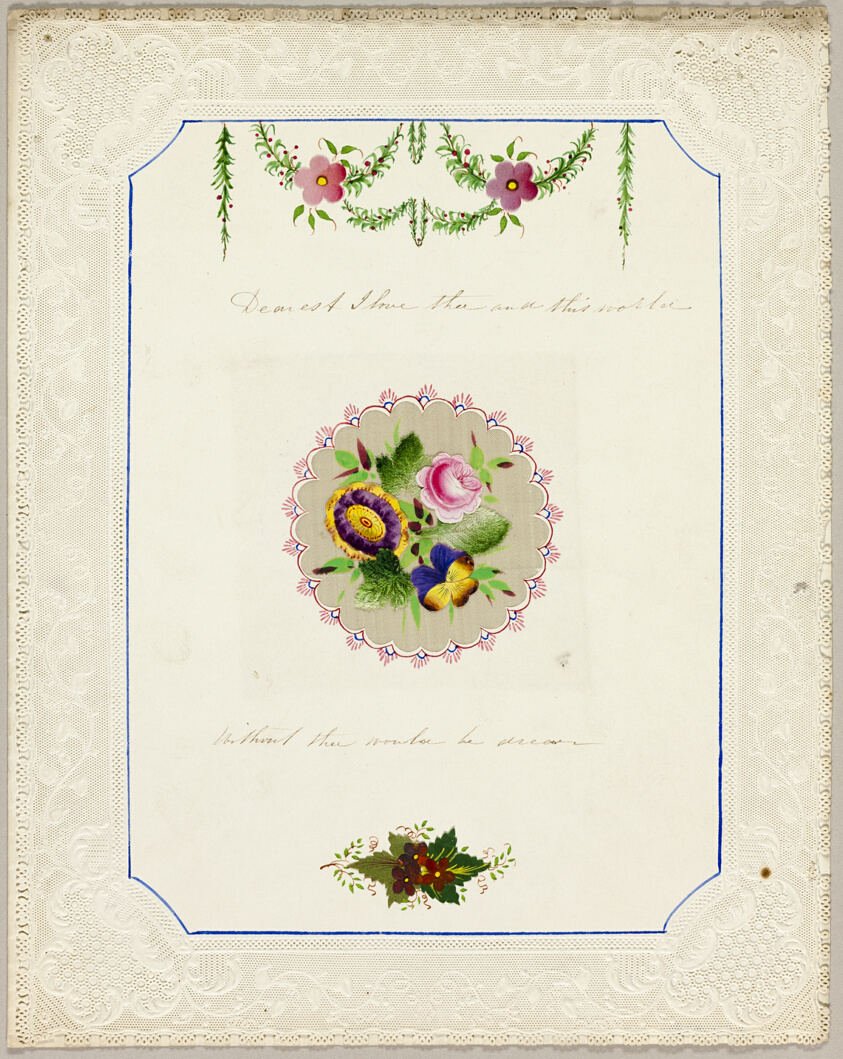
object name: Drawing and Watercolor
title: Dearest I Love Thee (valentine)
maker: Unknown Artist; English, 19th century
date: 1840/50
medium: Collaged elements and watercolor, with pen and brown ink on cut and embossed ivory wove paper (lace)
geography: England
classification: valentine; prints and drawing; paper